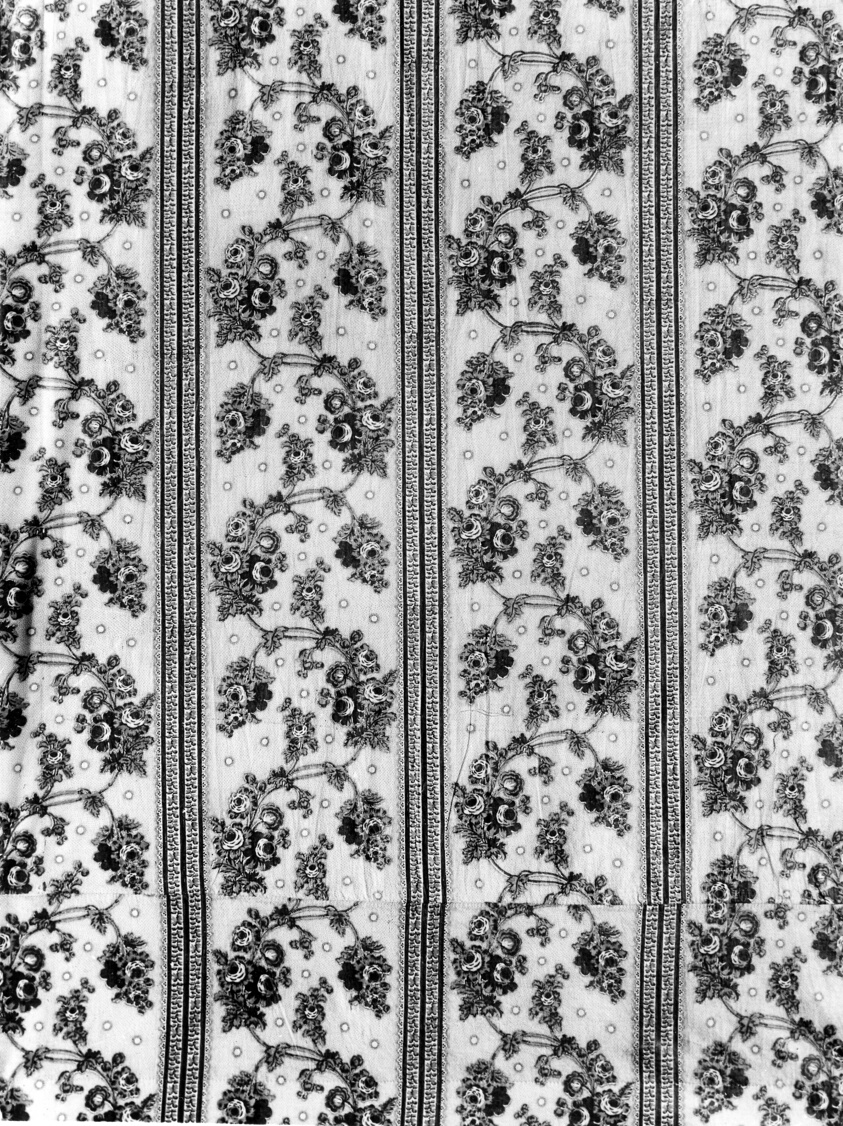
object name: Textile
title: Panel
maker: England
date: 19th century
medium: Cotton, plain weave; roller printed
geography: England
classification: textile; weaving - printed; weaving